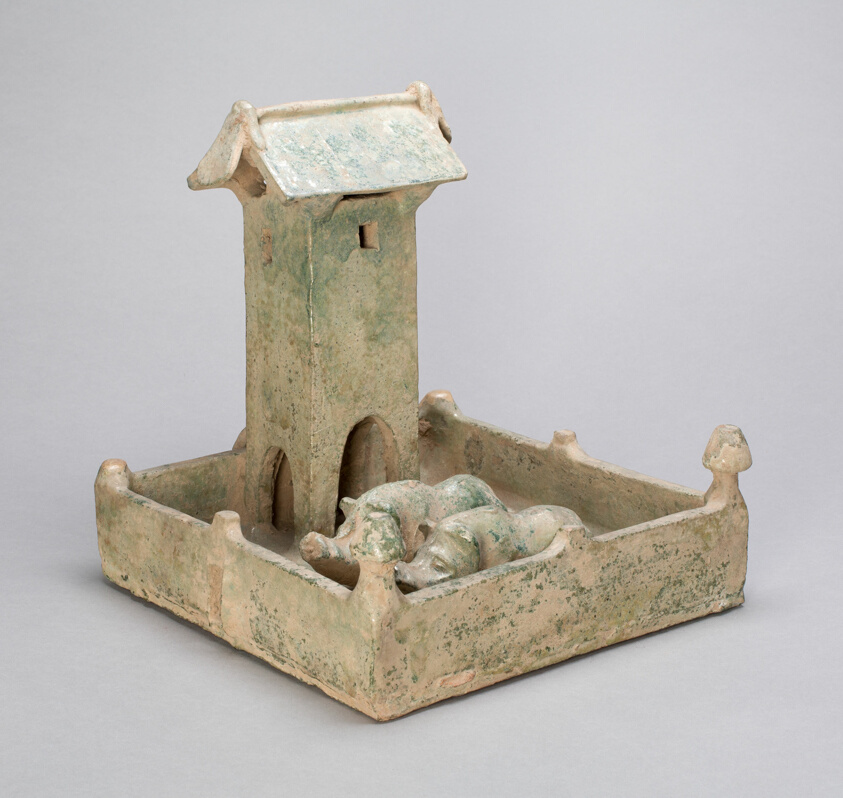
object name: Sculpture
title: Pigsty with Tower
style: Chinese (culture or style)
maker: China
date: Eastern Han dynasty (A.D. 25–220)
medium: Earthenware with green lead glaze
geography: China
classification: ceramics; asian art; sculpture